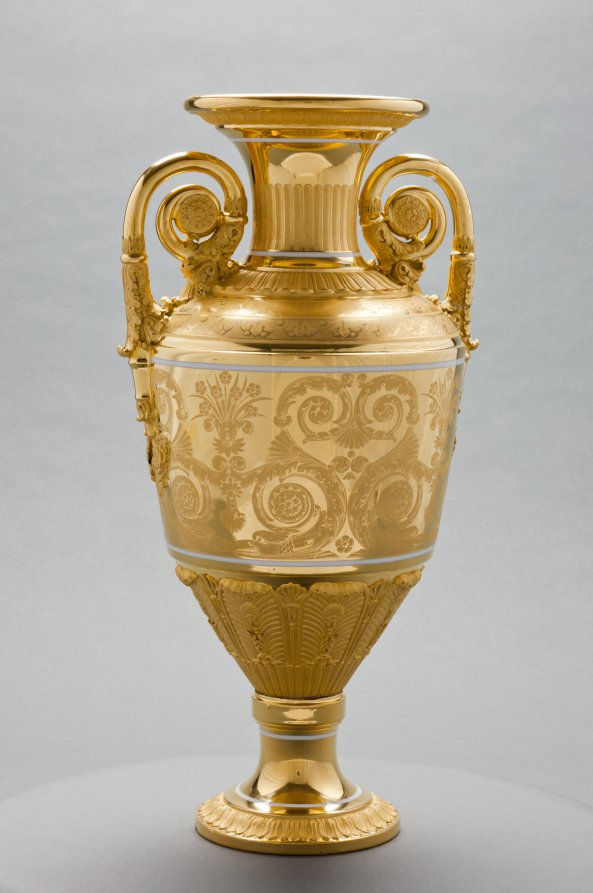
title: Vase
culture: Russia, St. Petersburg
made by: St. Petersburg Imperial Porcelain Factory (Russian)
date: c. 1820–1830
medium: gilt porcelain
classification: Ceramic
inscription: inscribed: "Moreau" in gold near lip.